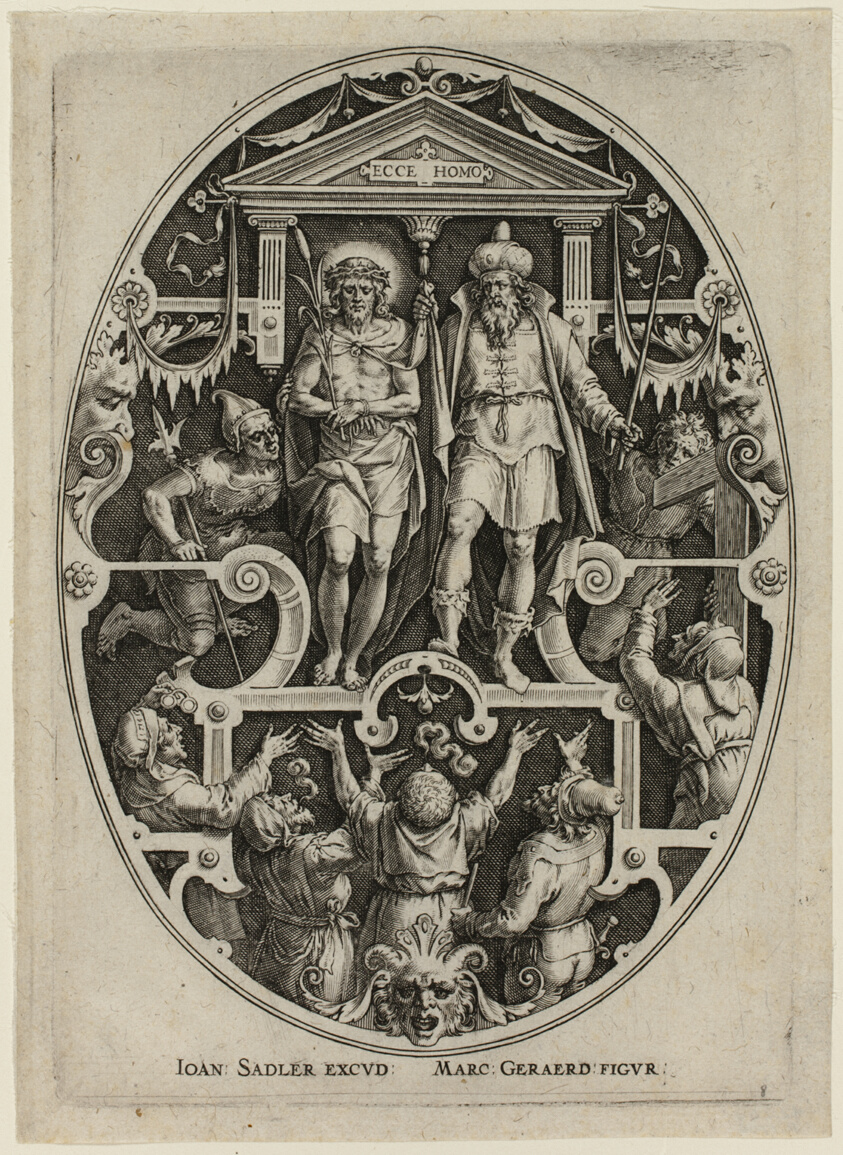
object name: Print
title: Ecce Homo, from Passion of Christ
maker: Jan Sadeler, the Elder (Flemish, 1550-1600); after Marcus Gheeraerts, the Elder (Flemish, c. 1520-c. 1590)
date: 1575/1600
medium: Engraving in black on ivory laid paper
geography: Flanders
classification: engraving; print; prints and drawing